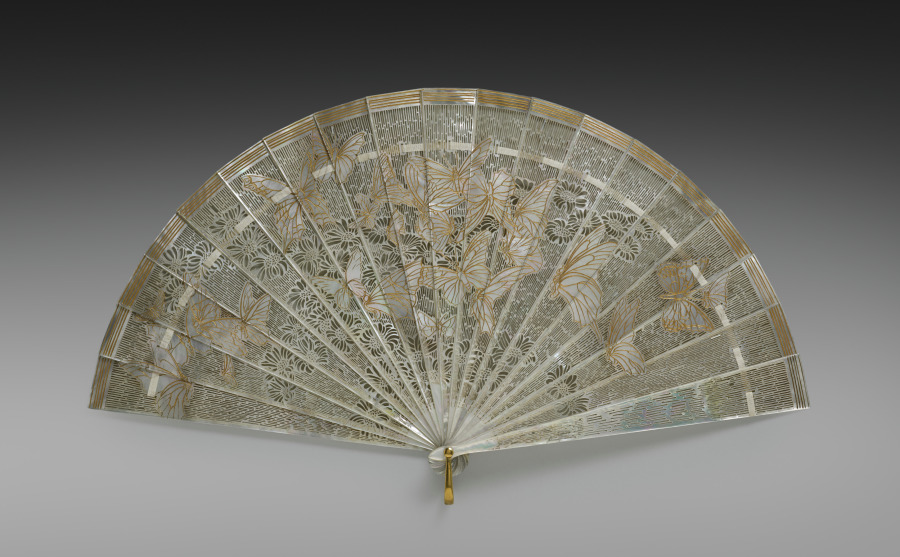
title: Fan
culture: France, 20th century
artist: René Lalique (French, 1860–1945)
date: c. 1900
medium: mother-of-pearl, gold, silk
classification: Jewelry